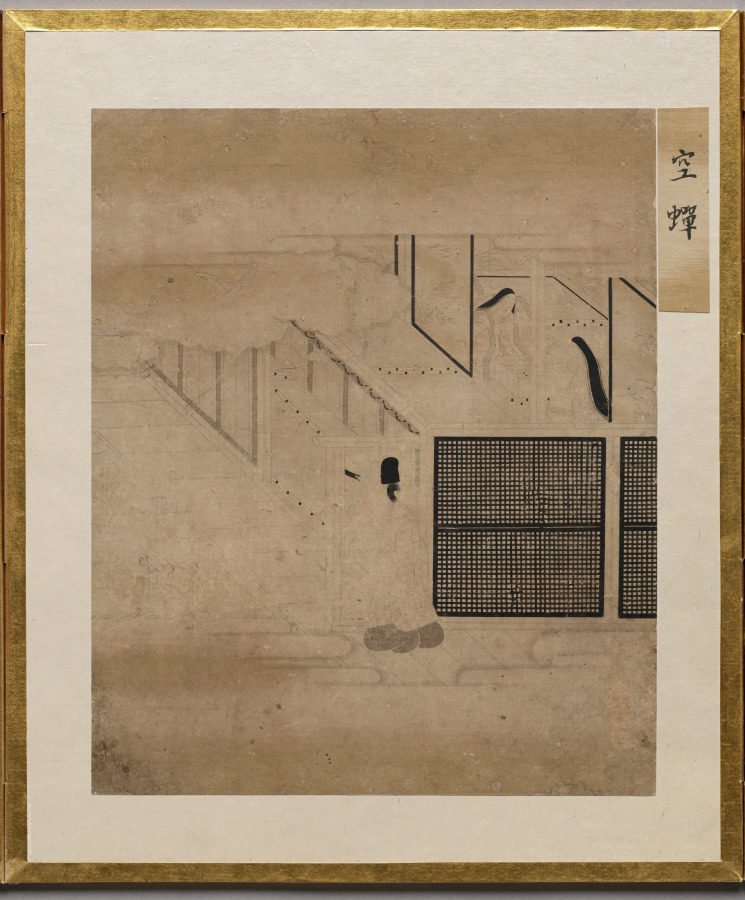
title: Shell of the Locust from Album of Illustrations for the Tale of Genji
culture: Japan, Edo period (1615–1868)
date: 1600s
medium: painting in an accordion-style album; ink, light color, and gold on paper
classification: Bound Volume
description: This album contains illustrations for the classic literary work the Tale of Genji, authored in the 1000s by Murasaki Shikibu, an aristocrat of the Heian period (794–1185) court. The scenes are painted in the “white drawing” (hakubyō) mode, in which a fine ink line is used to depict figures and spaces with great subtlety, punctuated only occasionally by traces of red pigment for a character’s lips, a detail of a garment, or a decorative element. These two scenes illustrate episodes from the chapters “Thin Veil of Cloud” (Usugumo) and “Barrier Gate” (Sekiya).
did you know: The illustrations are identified by chapter title in cartouches to the upper right of the paintings.